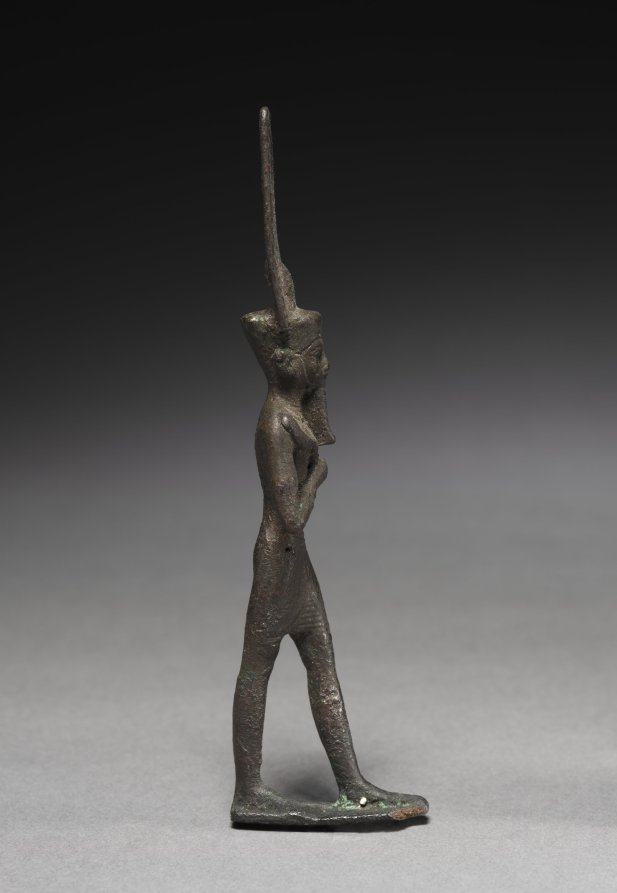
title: Statuette of Amen-Ra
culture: Egypt, Late period (715–332 BCE), Dynasty 26 or later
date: 664–525 BCE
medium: bronze, solid cast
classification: Sculpture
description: In this statue of Amen-Ra, the principal deity of the ancient Egyptian city of Thebes, his sun disk and double plume crown (here viewable as partial remains) represent his mystical powers, such as bringing light to the sky. In the Rick Owens ensemble, a light bulb helmet is reminiscent of the physical and mythological characteristics of Amen- Ra’s double plume crown. After a trip to Egypt, Owens designed his fall 2022 men’s collection, which centered around symbols associated with ancient Egyptian deities, playing into the mainstream mystical interest about that religion.